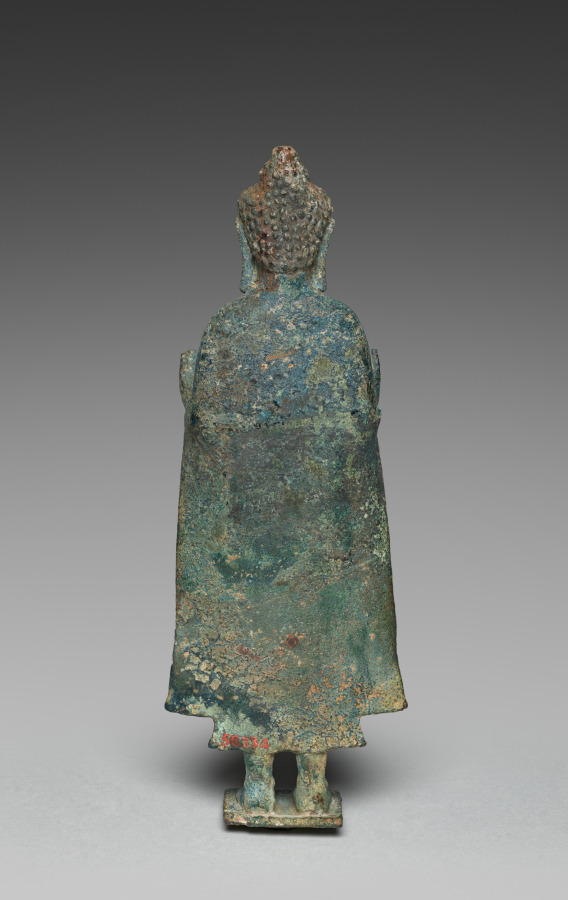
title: Buddha with Hands in Gesture of Teaching, Vitarka Mudra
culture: Thailand, Mon-Dvaravati period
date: 600s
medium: bronze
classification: Sculpture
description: Made during the early phase of Buddhist art production in mainland Southeast Asia, this Buddha wears a plain robe that indicates the artist's awareness of images made at the workshops of Sarnath, on the Ganges River in India. The hem of the lower garment, worn under the monk's robe, elegantly crosses the ankles, and the subtle line at the waist shows where it is secured.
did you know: Bronze sculptures in Thailand were made by sculpting clay around an iron armature; the clay core remains inside.